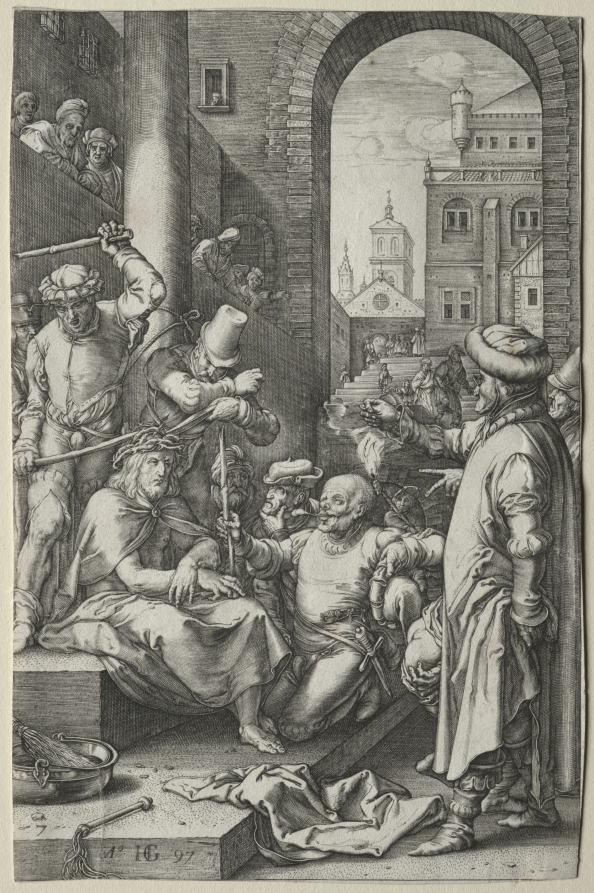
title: The Passion: The Crowning with Thorns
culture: Netherlands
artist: Hendrick Goltzius (Dutch, 1558–1617)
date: 1597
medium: engraving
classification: Print